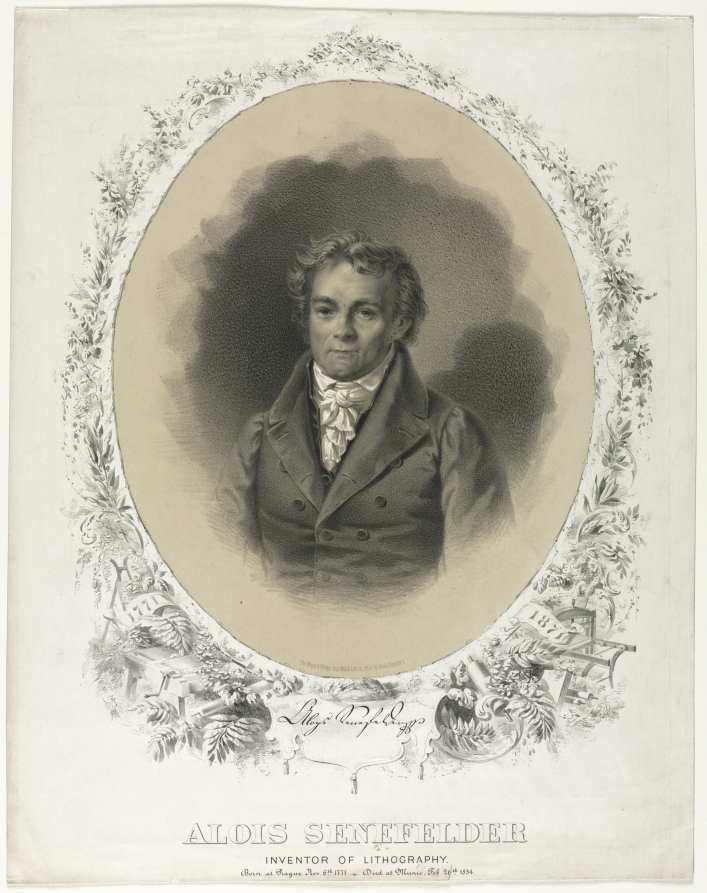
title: Alois Senefelder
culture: America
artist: Joseph F. Knapp (American)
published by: and Henry B. Major (American)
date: 1871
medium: lithograph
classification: Print